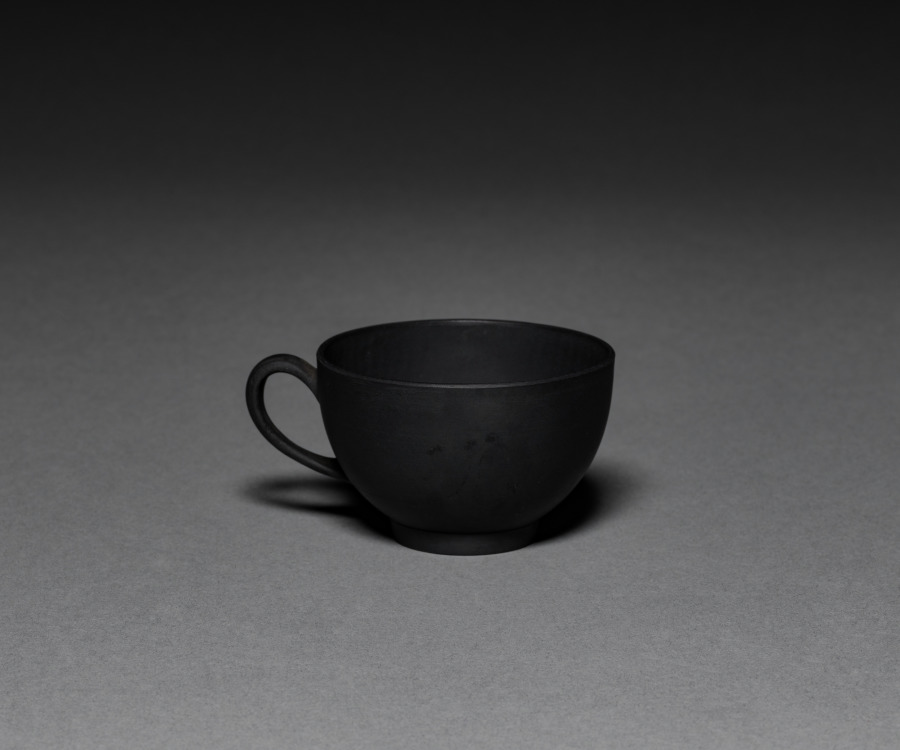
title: Cup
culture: England, Staffordshire, late 18th century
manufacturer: Wedgwood Factory (British)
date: late 1700s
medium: pottery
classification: Ceramic